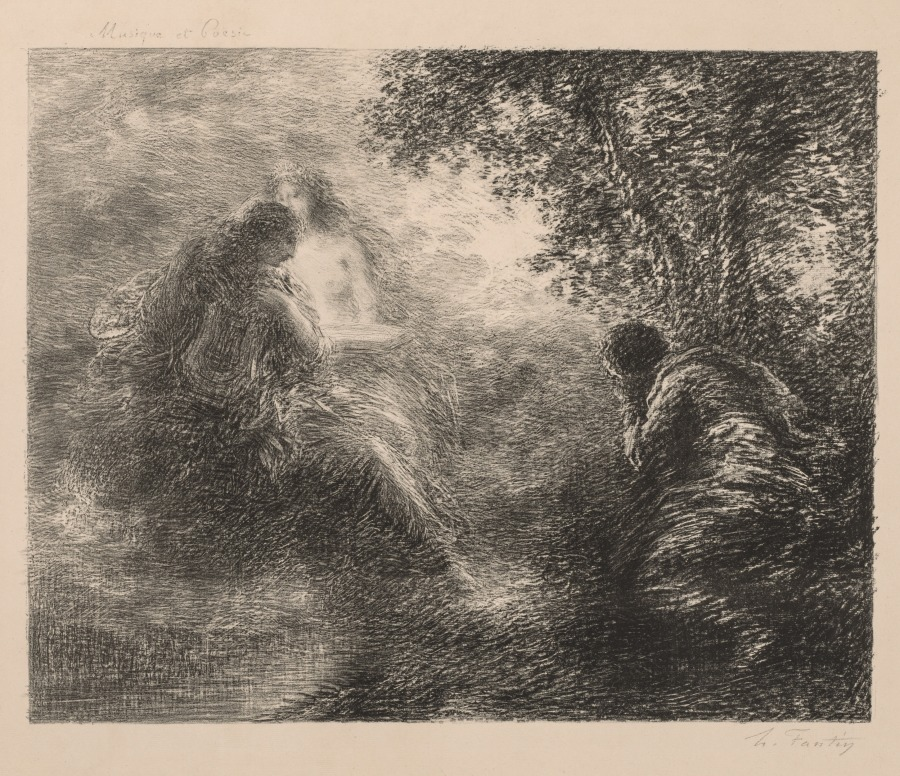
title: Music and Poetry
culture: France, 19th century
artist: Henri Fantin-Latour (French, 1836–1904)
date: 1883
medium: lithograph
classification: Print